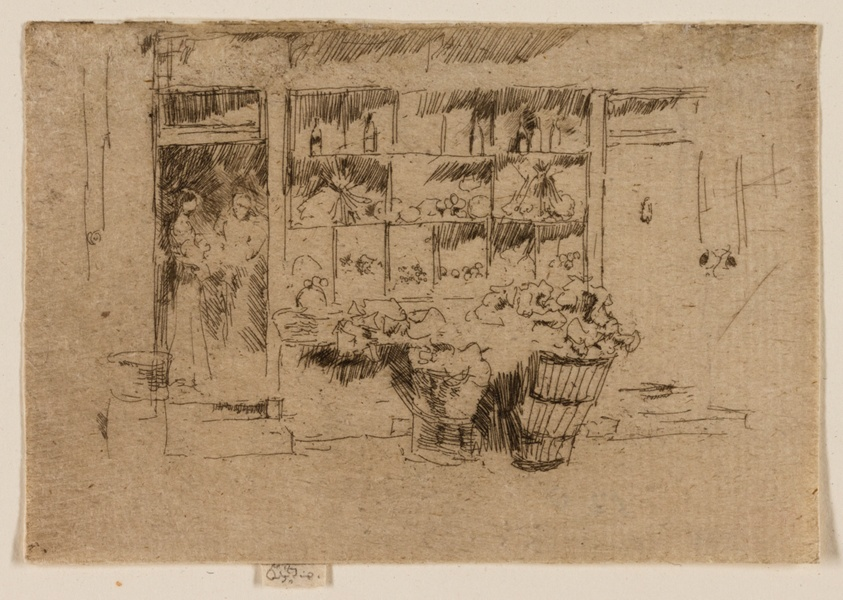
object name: Print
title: Little Greengrocer's Shop, Chelsea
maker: James McNeill Whistler (American, 1834-1903)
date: 1886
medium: Etching and drypoint with foul biting in brown ink on ivory laid paper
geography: United States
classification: etching; drypoint; foul biting; print; prints and drawing; paper